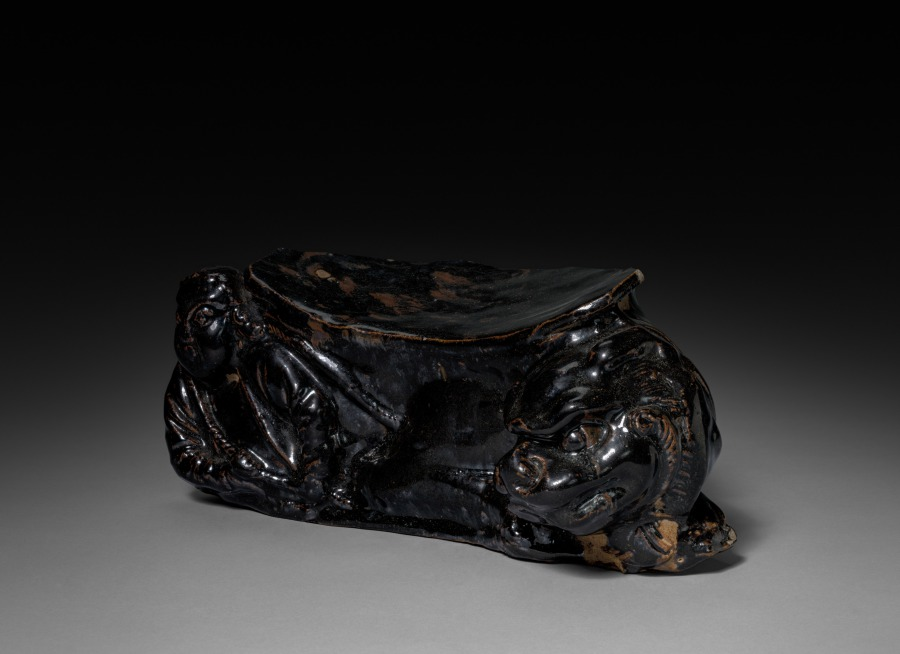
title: Pillow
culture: China, Yuan dynasty (1271-1368)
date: 1100s-1200s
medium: Glazed stoneware, Cizhou ware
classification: Ceramic